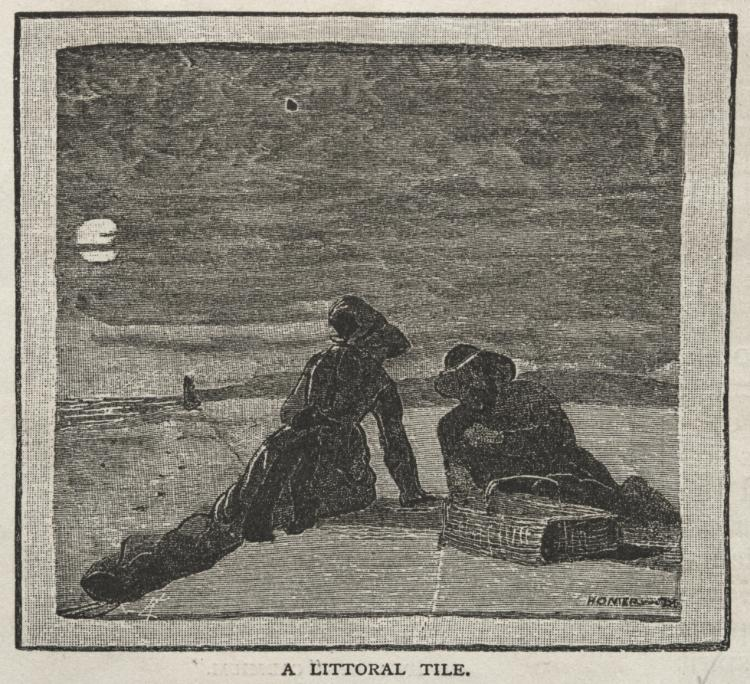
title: A Littoral Tile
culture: America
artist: Winslow Homer (American, 1836–1910)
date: 1879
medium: wood engraving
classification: Print